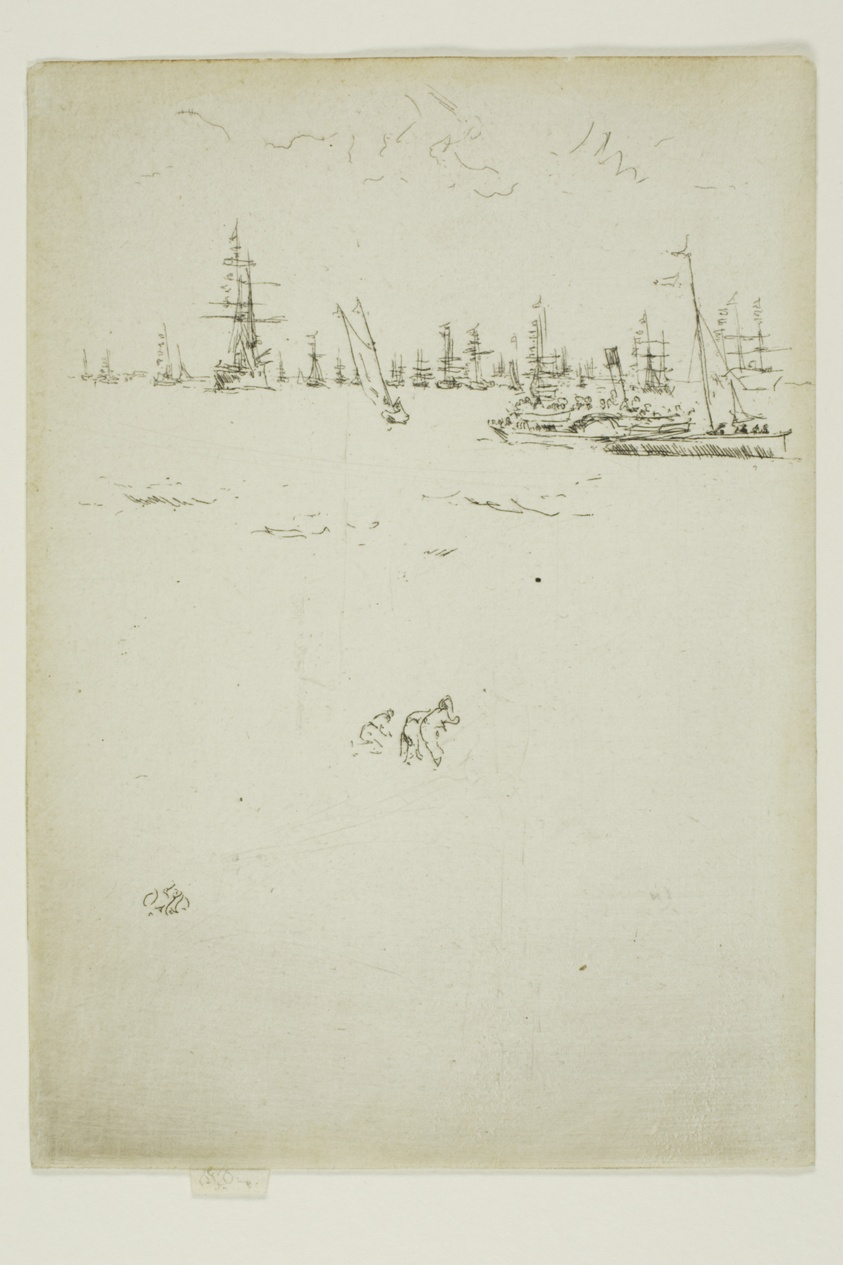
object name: Print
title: The Visitors' Boat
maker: James McNeill Whistler (American, 1834-1903)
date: 1887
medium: Etching with foul biting in black ink on ivory laid paper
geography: United States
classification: etching; foul biting; print; prints and drawing; paper